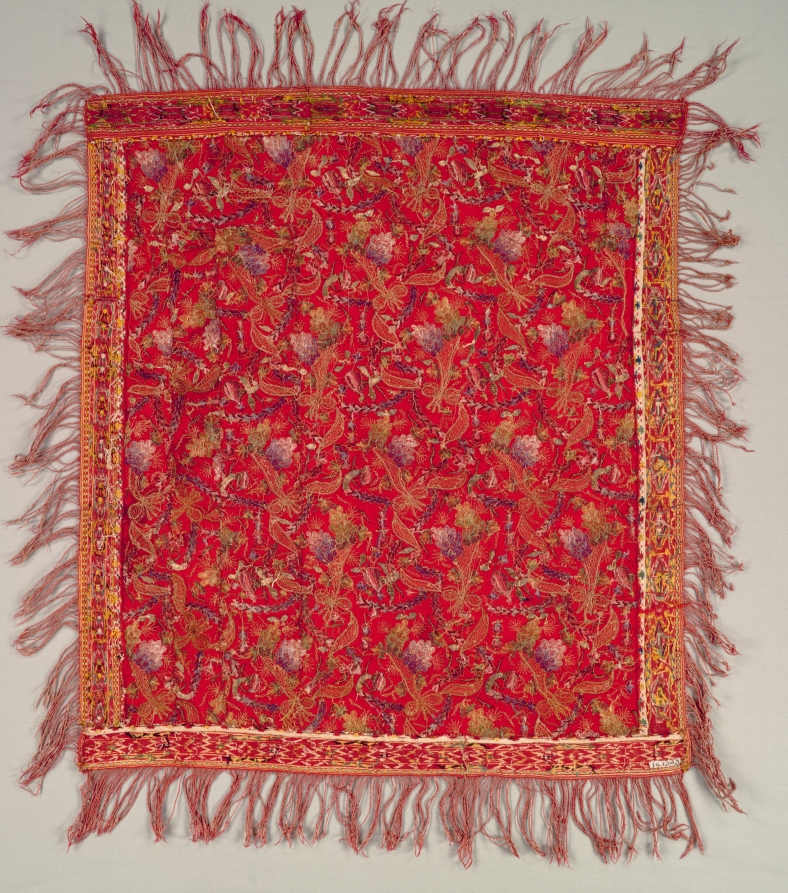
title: Embroidered Square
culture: Turkey, 18th-19th century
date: 18th-19th century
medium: embroidery: silk and metallic thread on wool ground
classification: Embroidery